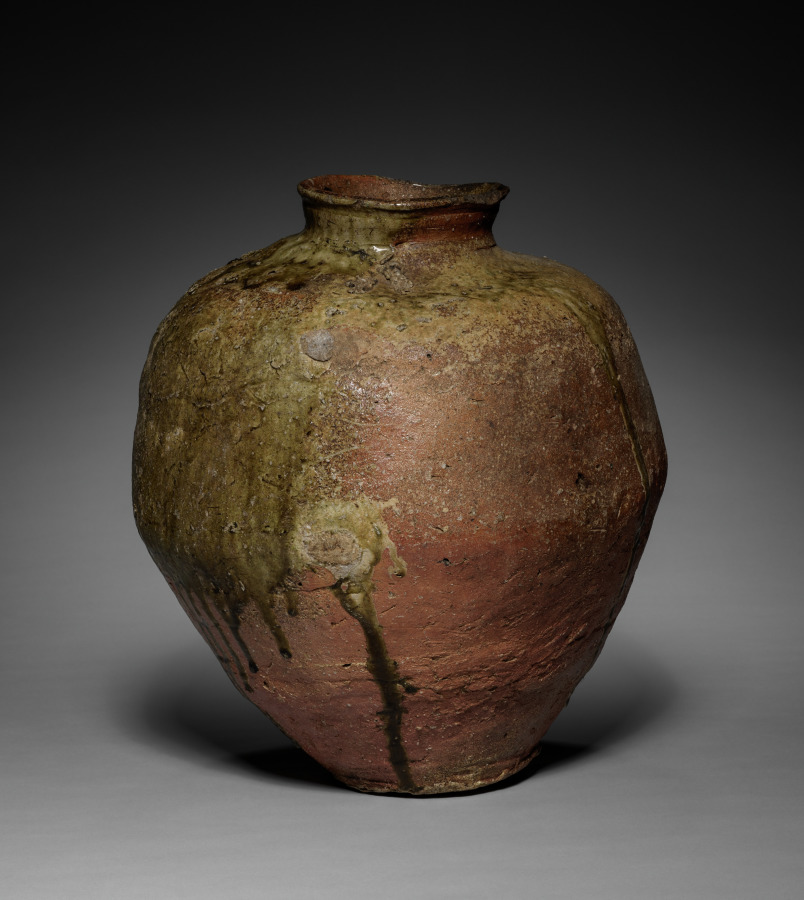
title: Large Jar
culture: Japan, Muromachi period (1392–1573)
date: 1400s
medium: stoneware with natural ash glaze (Shigaraki ware)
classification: Ceramic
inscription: Box inscription (front): 「不明」壺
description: The orange color of this jar comes from iron in the clay. Natural ash glaze settled on the vessel during firing. Originally intended for grain storage, rustic containers like this one were also prized by tea enthusiasts, who appreciated the uncalculated beauty of the glaze and the asymmetry of these humble objects. They used them to store tea leaves.